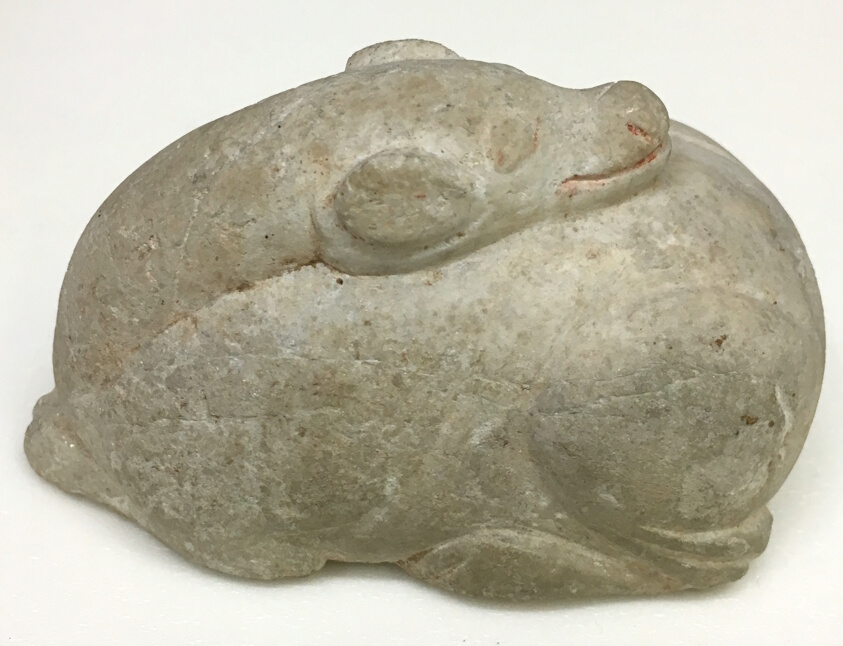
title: Deer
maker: China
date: Han Dynasty (206 BCE–220CE)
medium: Bronze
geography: China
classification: stone (unidentified); stone; sculpture; asian art